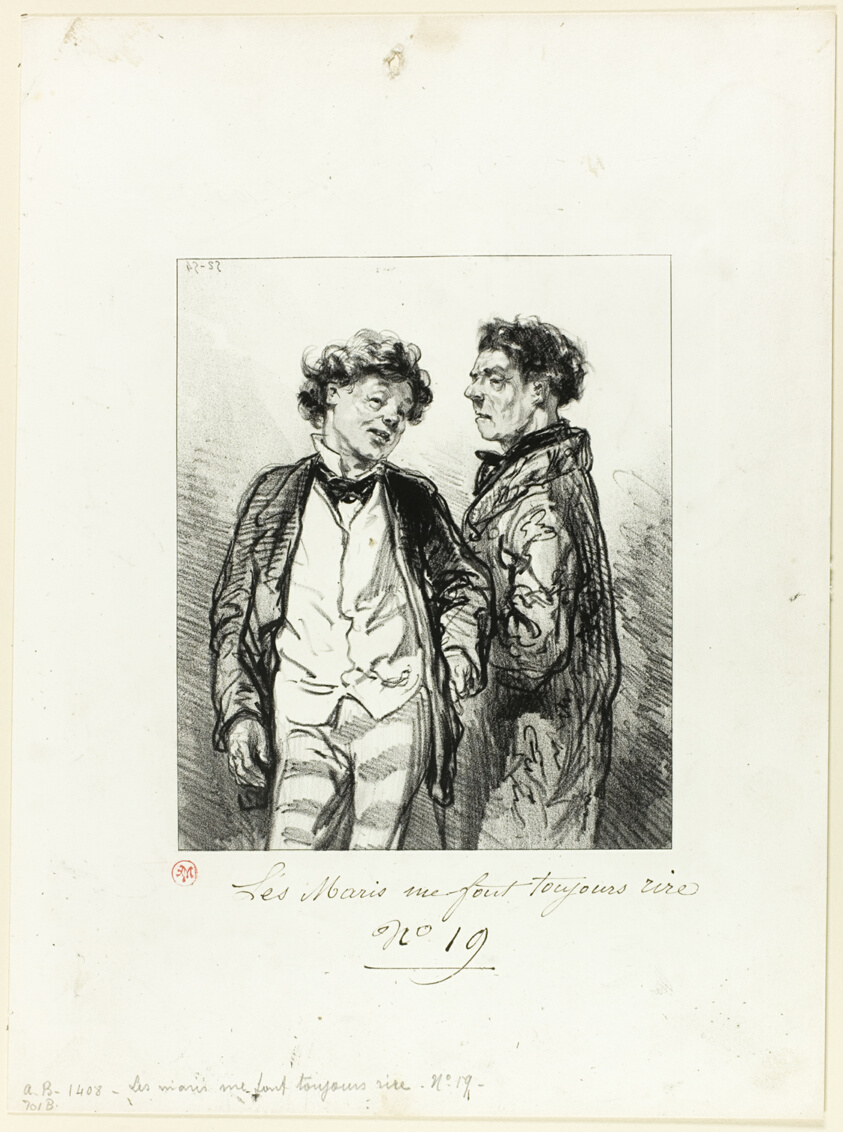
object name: Print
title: Husbands Always Make Me Laugh: Really my son-in-law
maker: Paul Gavarni (French, 1804-1866)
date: 1853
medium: Lithograph in black on cream wove paper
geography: France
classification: lithograph; print; prints and drawing